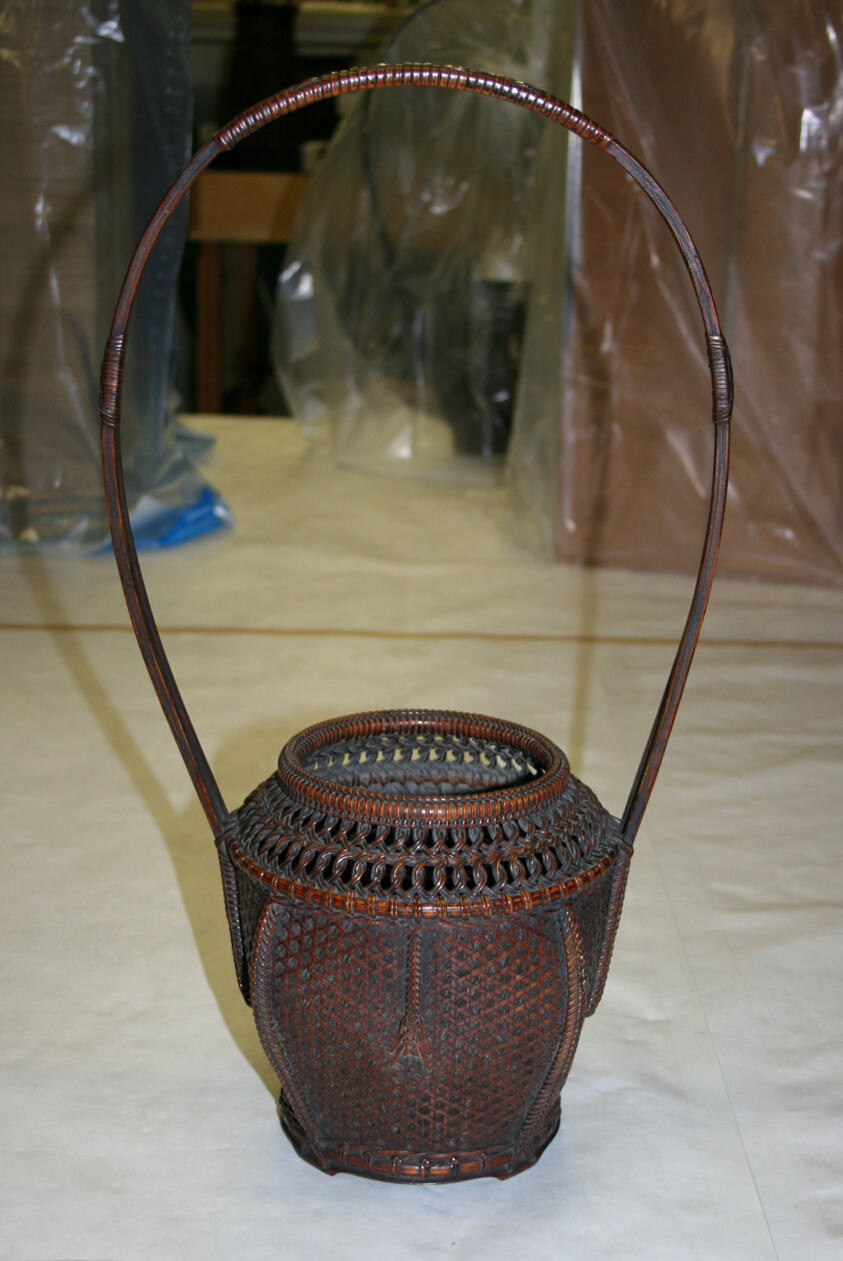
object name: Decorative Arts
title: Peony Ikebana Basket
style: Japanese (culture or style)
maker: Artist unknown; Japanese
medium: Bamboo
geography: Japan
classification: basketry; decorative arts